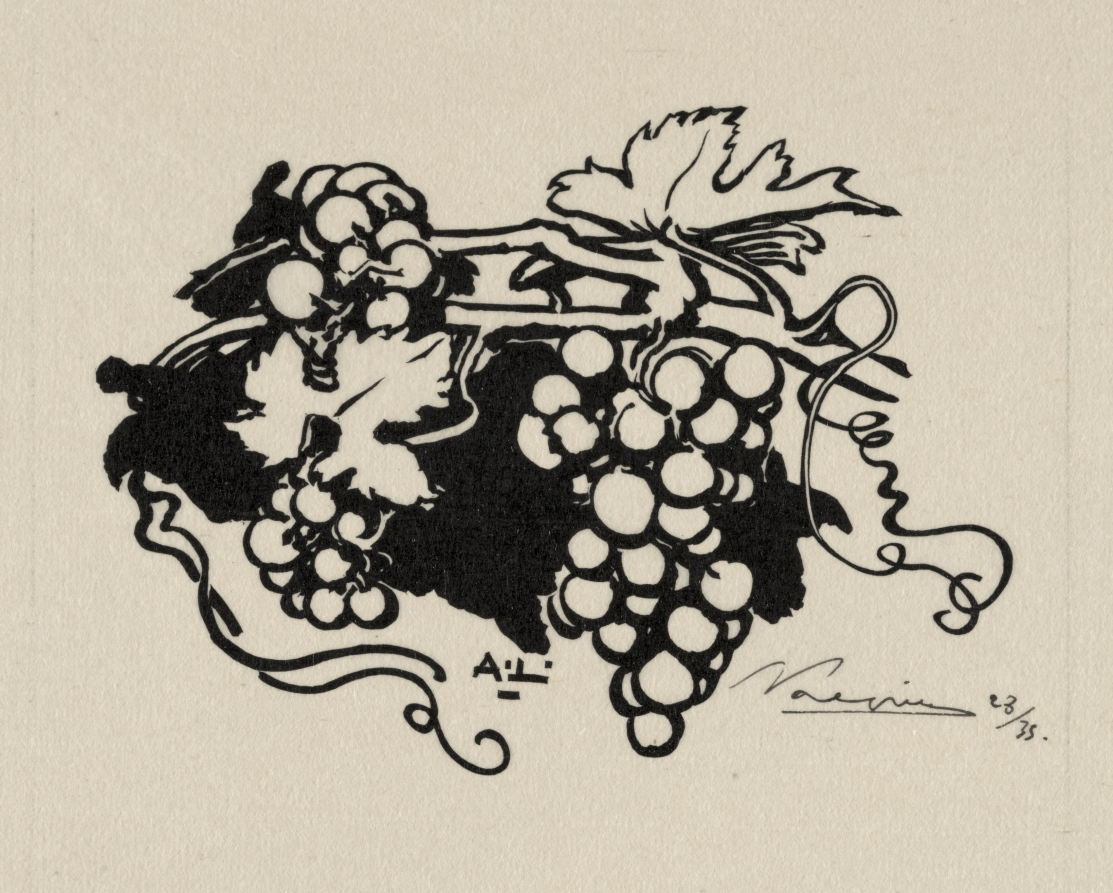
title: Un Cul-de-lampe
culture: France, 19th-20th century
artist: Auguste Louis Lepère (French, 1849–1918)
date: c. 1870–1918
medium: wood engraving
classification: Print